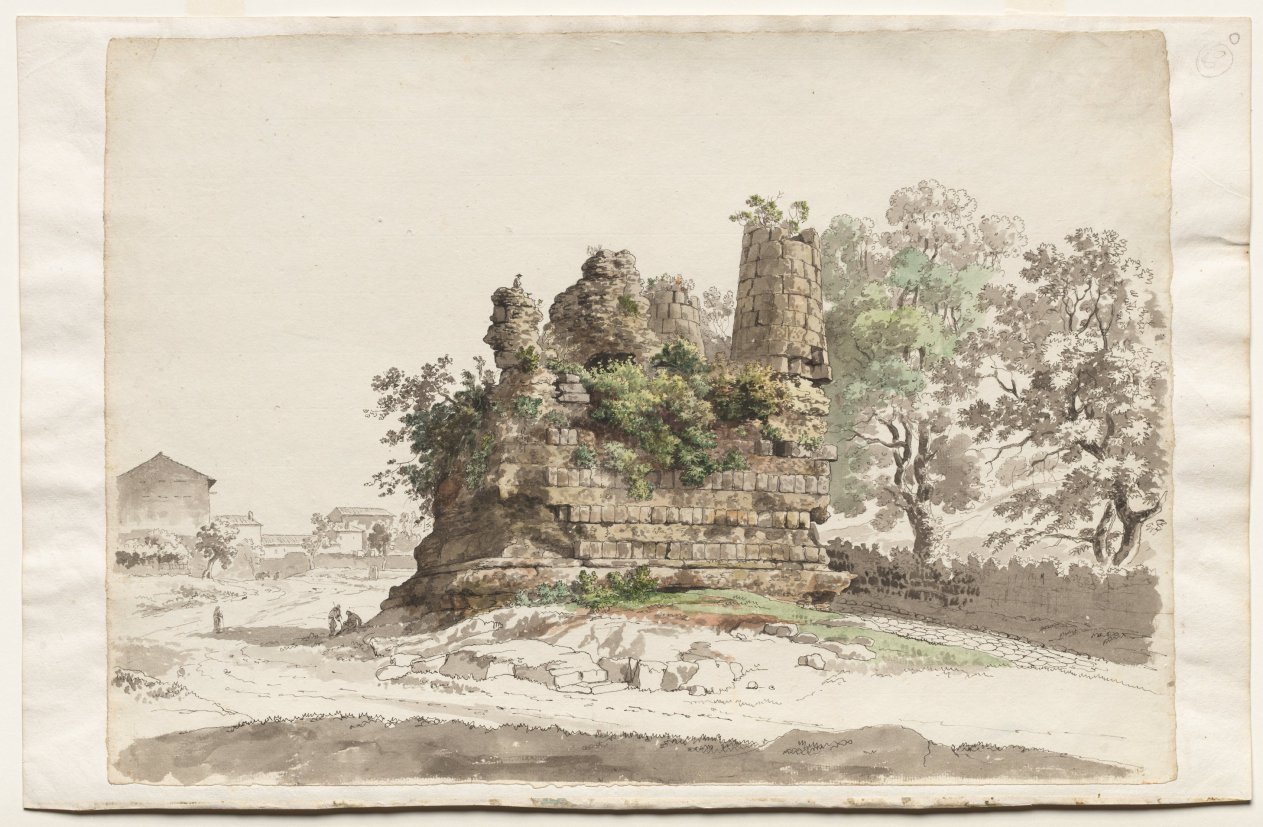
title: The So-Called Sepulcher of the Curiatii Brothers at Albano, with the Church of the Madonna della Stella in the distance at left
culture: Italy, 18th century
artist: Carlo Labruzzi (Italian, 1748–1817)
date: c 1770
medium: pen and black ink, grey wash and watercolor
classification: Drawing